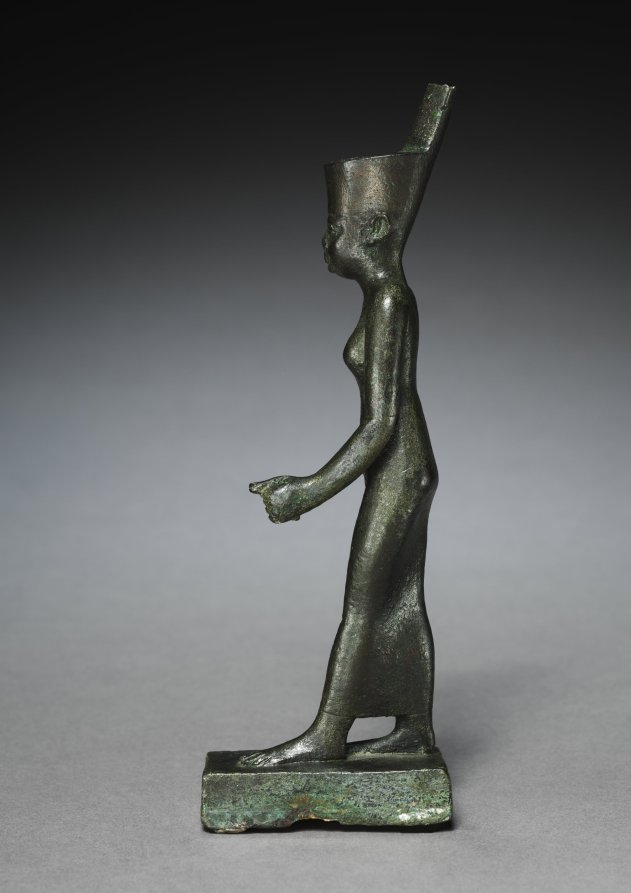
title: Statuette of Neith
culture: Egypt, Greco-Roman period (332 BCE–395 CE), Ptolemaic dynasty (305–30 BCE)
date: 305–30 BCE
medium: bronze, solid cast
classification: Sculpture